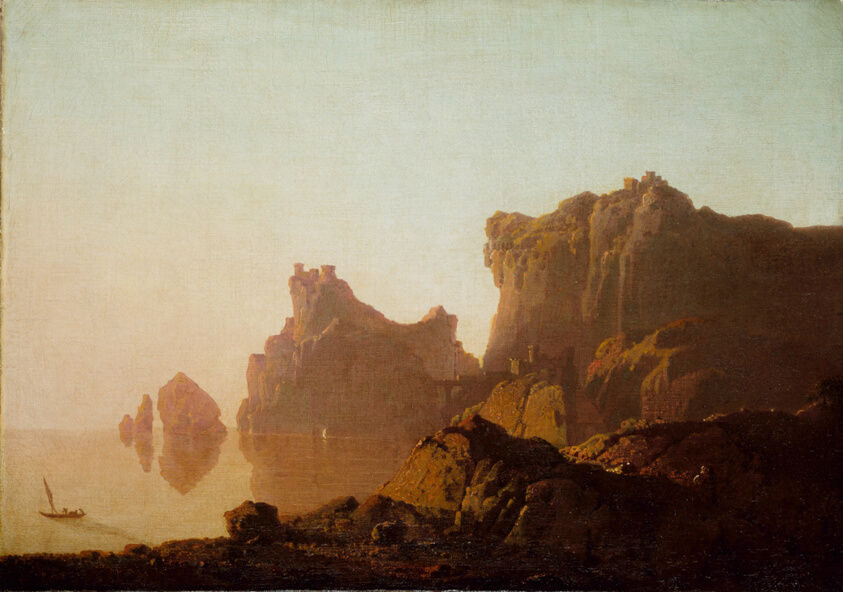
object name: Painting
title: The Gulf of Salerno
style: 18th Century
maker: Joseph Wright of Derby (British, 1734-1797)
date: 1783/85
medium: Oil on canvas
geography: England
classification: oil on canvas; british; paint; oil paintings (visual works); european painting; painting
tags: landscape, water, seascapes, seas, sea, sailing, rocks, landscapes, boats, boatman